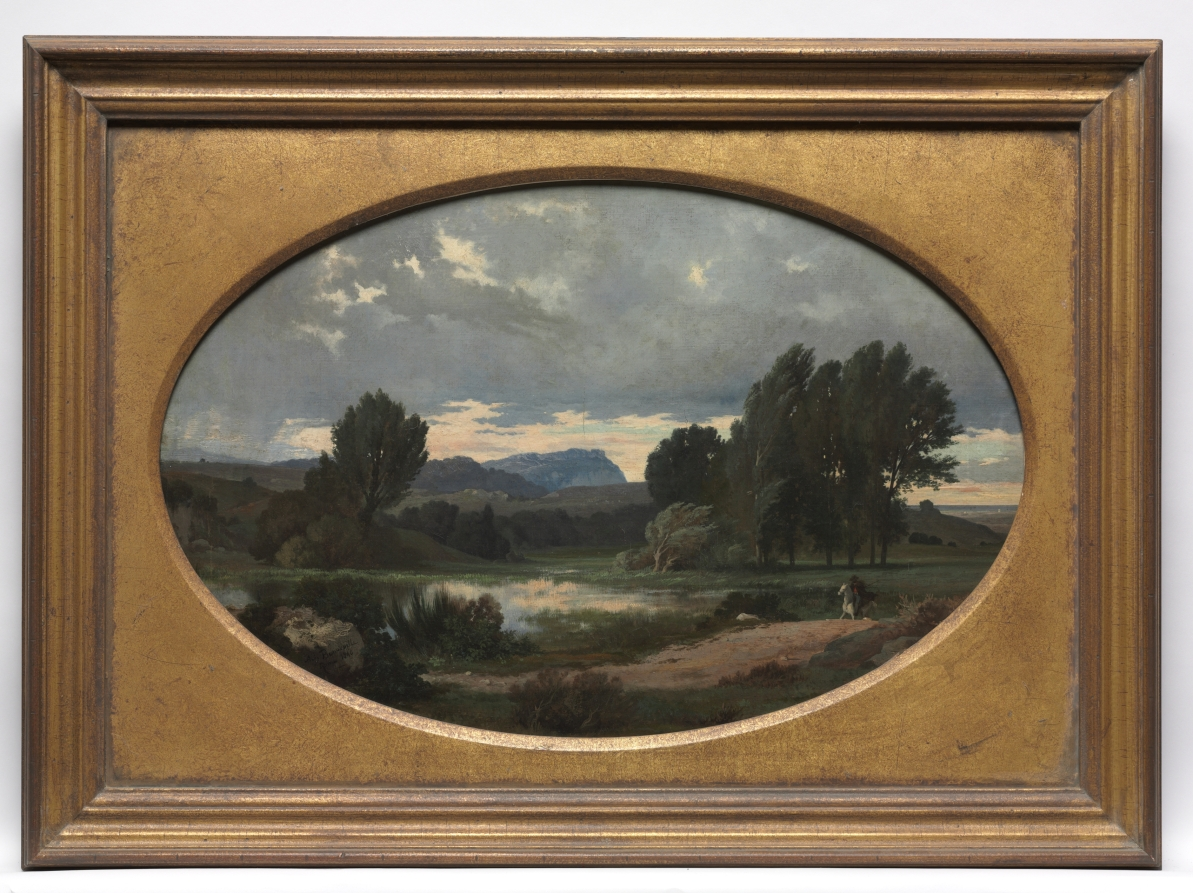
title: Landscape with Rider on White Horse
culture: France, 19th century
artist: Jean Achille Benouville (French, 1815–1891)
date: 1846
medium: oil on canvas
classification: Painting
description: The darkly shaded trees and turbulent sky introduce a romantic sentiment into this classical or ideal landscape in which a lone rider on horseback gallops through a deep space. The composition is organized into three clearly defined zones that recede from the path in the foreground, to the lake or river in the middle ground, to the distant rocky mountain and sea.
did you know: In 1863, Benouville was named a Knight in the Legion of Honor, the highest French order of merit.